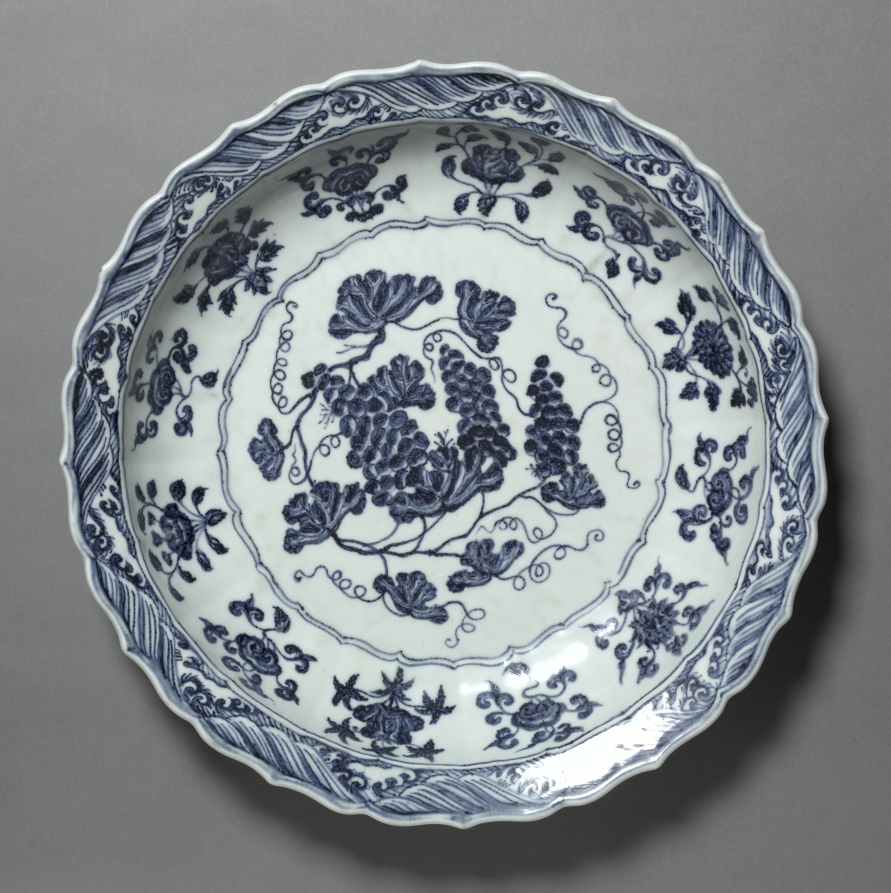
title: Plate with Grapes and Floral Sprays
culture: China, Jiangxi province, Jingdezhen, Ming dynasty (1368-1644), Yongle period (1403-24)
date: 1403–24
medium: porcelain with underglaze blue decoration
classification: Ceramic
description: This large platter with grape and floral decoration, which is different from small stem cups decorated with dragons, CMA 1957.60 and CMA 1964.168, was made primarily for export to southeastern and western Asia. However, a similar example bearing the Xuande reign mark has also been excavated from the Ming imperial kilns at Jingdezhen.